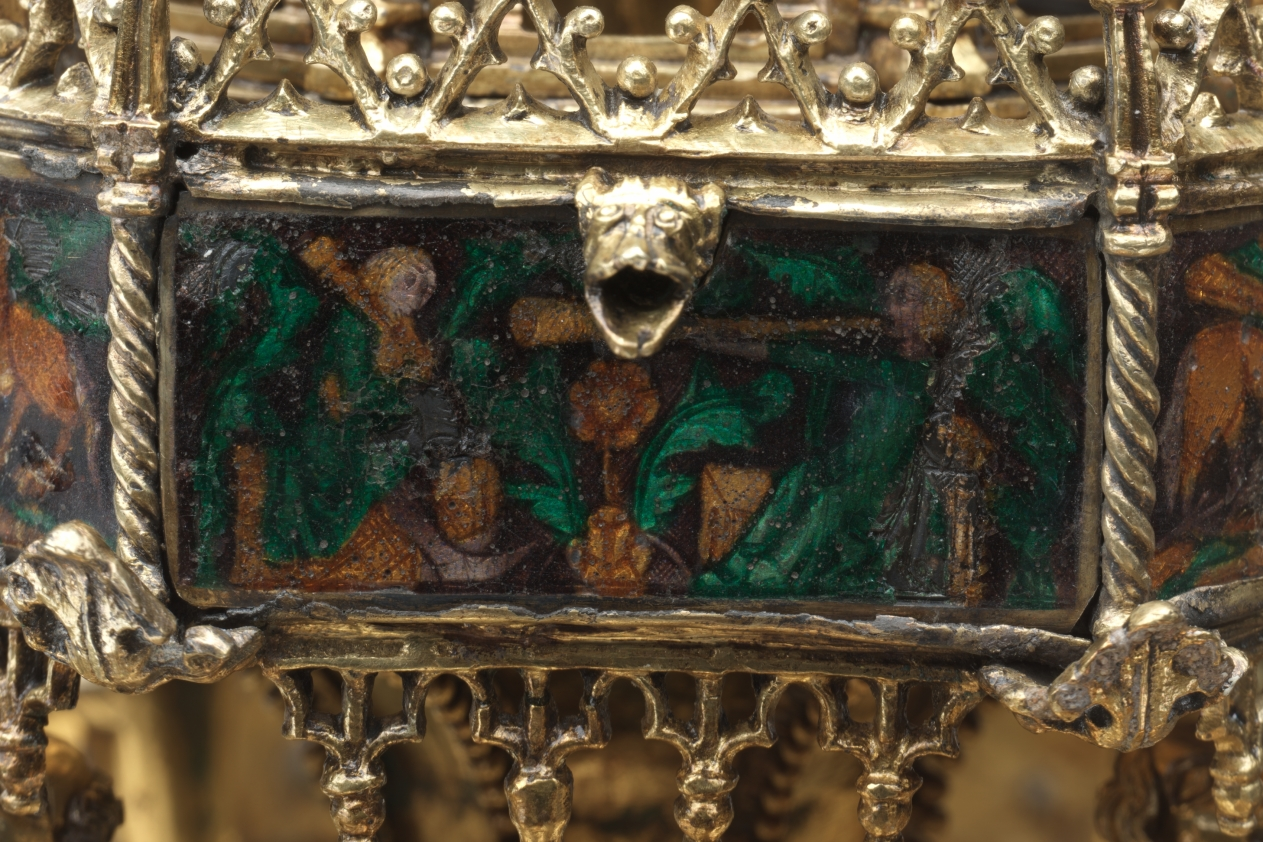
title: Table Fountain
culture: France, Paris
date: c. 1320–40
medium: gilt-silver and translucent enamels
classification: Metalwork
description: Conceptually and stylistically, this object is beyond all else a piece of Gothic architecture in miniature with vaults, pinnacles, columns, and traceried arches. Though the artist who created it is unknown, he was unquestionably inspired by the great Gothic buildings of his time. The table fountain is a three-tiered assembly combining cast elements with bent sheets of gilt-silver. To these have been attached a series of enamel plaques representing grotesque figures, some of which play musical instruments. Water wheels and bells were added to capture motion and sound. The rich detail, precious materials, and involved ornamentation of this deluxe object suggest it would have been expensive to produce and highly treasured by its original owner, someone of high status, and would have been deployed as an object of spectacle. This is the most complete example of its type known to survive from the Middle Ages. Medieval inventories reveal that small fountains like this, often taking various forms, and generally made from precious metals, once existed in large numbers, thus making the Cleveland table fountain an extremely rare object.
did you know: This fountain with its minute architectural details and finely made enamel plaques displayed the wealth and refinement of the owner as it entertained his guests. Imagine hearing the ringing of the tiny bells when this fountain was in use.